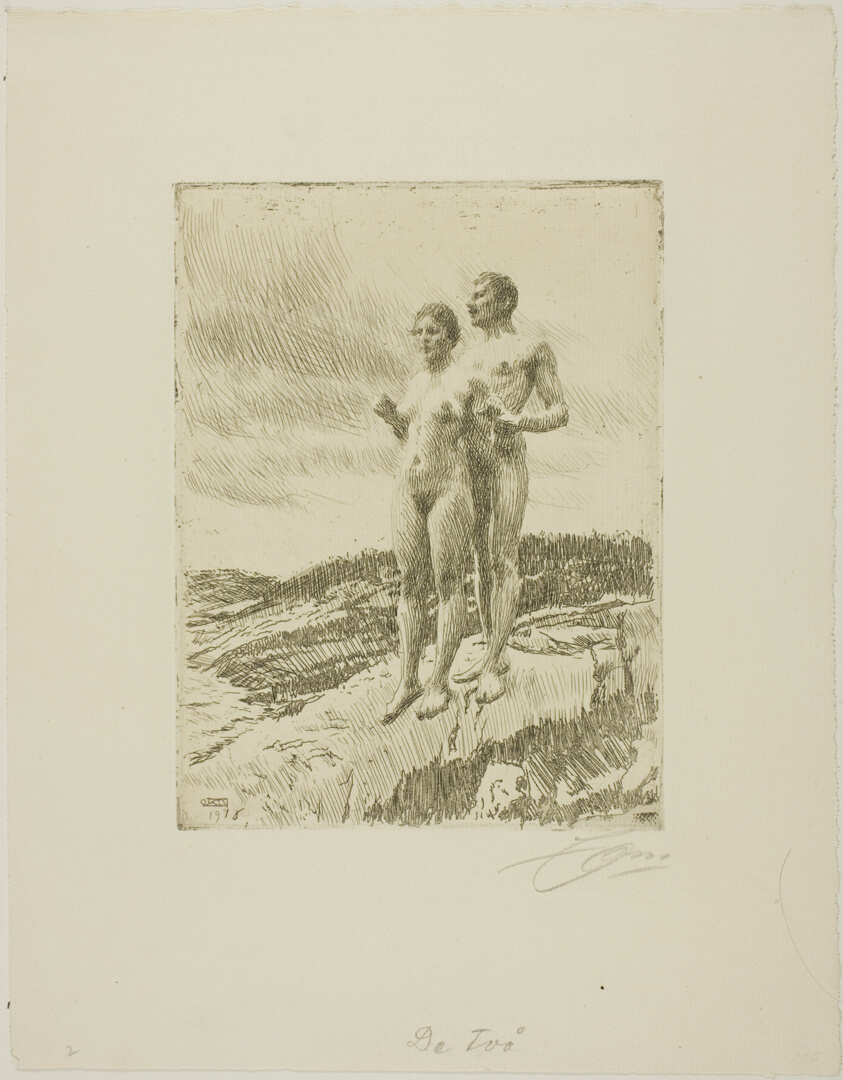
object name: Print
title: The Two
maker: Anders Zorn (Swedish, 1860-1920)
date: 1916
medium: Etching on ivory laid paper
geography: Sweden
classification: etching; print; prints and drawing